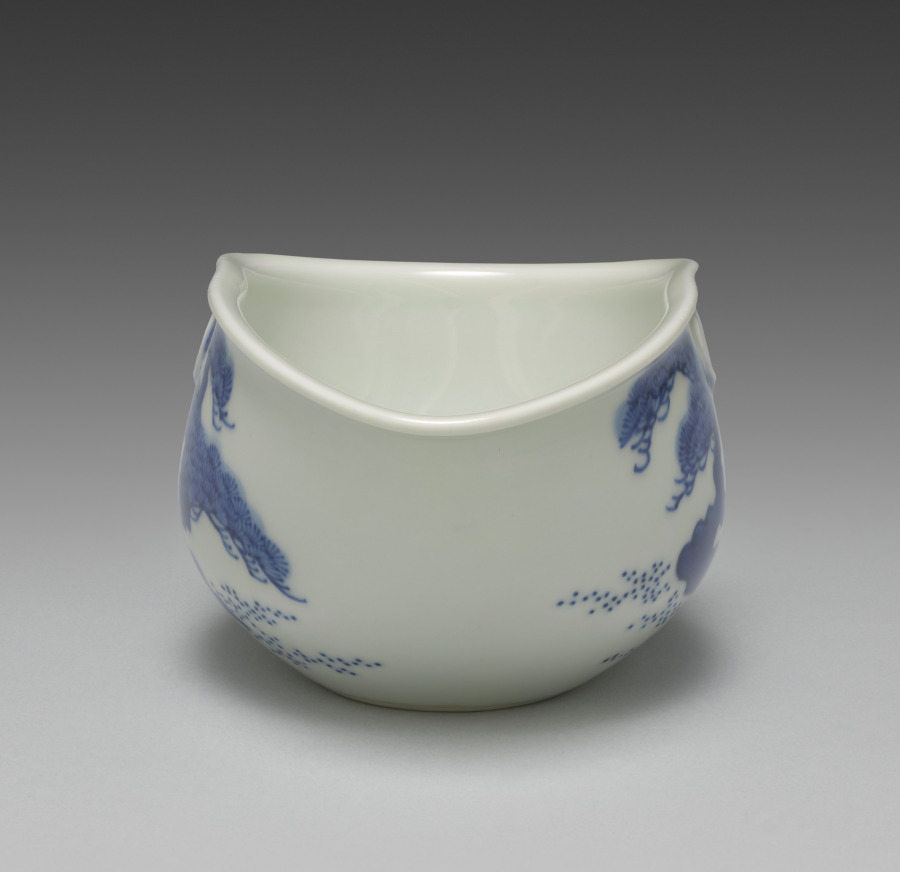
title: Water Cooler with Pines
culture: Japan, Meiji period (1868–1912)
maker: Seifū Yohei III (Japanese, 1851–1914)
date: 1893–1914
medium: Porcelain with underglaze blue and molded designs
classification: Ceramic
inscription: The center of the base contains an ovoid “Seifu” seal.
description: Hot water coolers, or yuzamashi, are essential components of sencha tea sets. Yuzamashi are used to cool boiled water to the ideal temperature for the type of tea to be brewed. The kidney-like shape of this one permits it to be cradled in one hand, following curvature of the palm, with the tips of the thumb and index finger each pressed against a nyoi staff-head-shaped applied form, perfectly placed to ensure a stable hold. Someone pinching the cooler in this way would have enough protection from the heat to maintain a steady grip but also sufficient contact along the base of thumb to assess the water temperature. On each of the cooler’s two longer sides, a pine tree in grass or sand is painted under the glaze in cobalt blue. The tree on one side has two main roots and two large branches, while that on the other has a single, thick, curved line from root to tip with racks of needles spreading across the width of the sky. A blue oval is traced along the footring, and the center of the base contains an ovoid “Seifu” seal.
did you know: Evergreen, pines have associations with eternal youth and longevity.